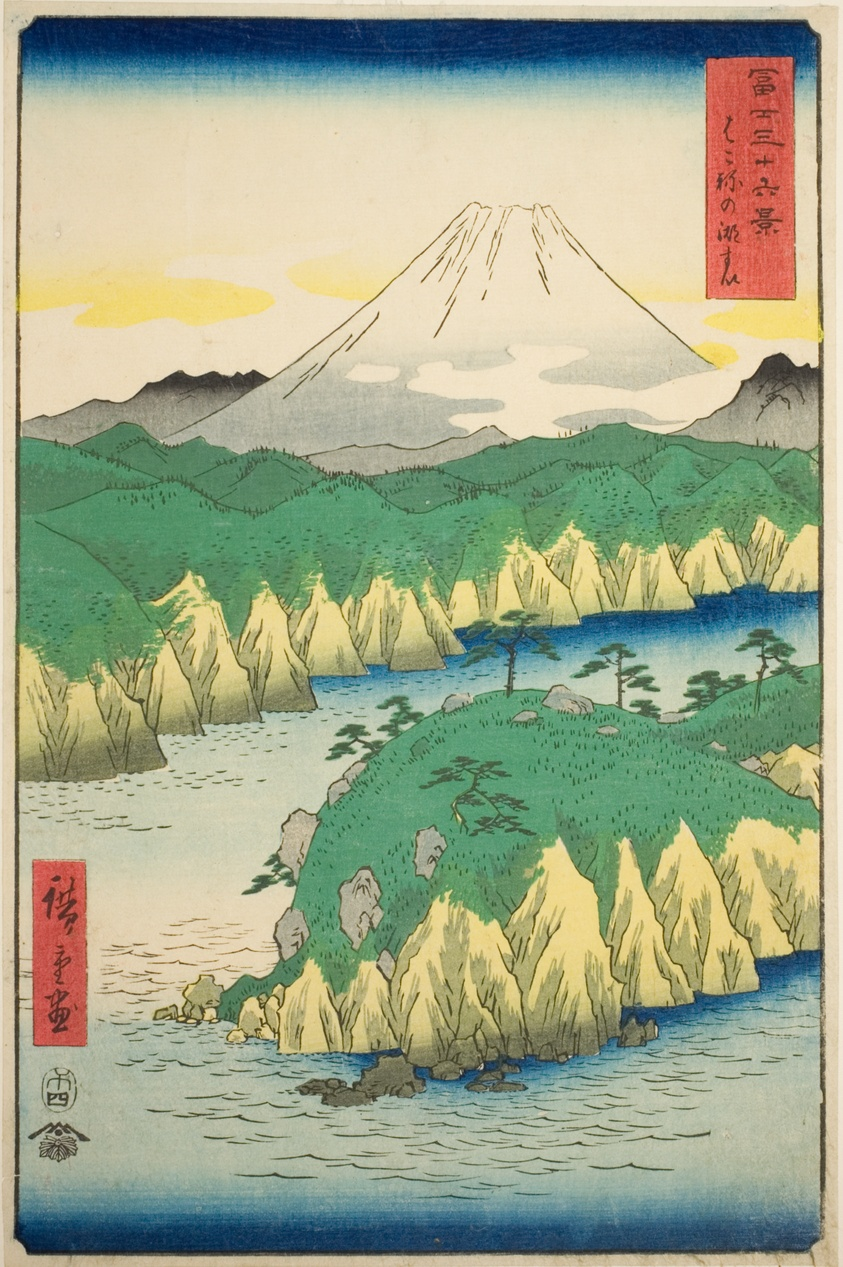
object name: Print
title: Lake at Hakone (Hakone no kosui), from the series "Thirty-six Views of Mount Fuji (Fuji sanjurokkei)"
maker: Utagawa Hiroshige 歌川 広重; Japanese, 1797-1858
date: 1858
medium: Color woodblock print; oban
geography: Japan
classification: woodblock print; print; asian art